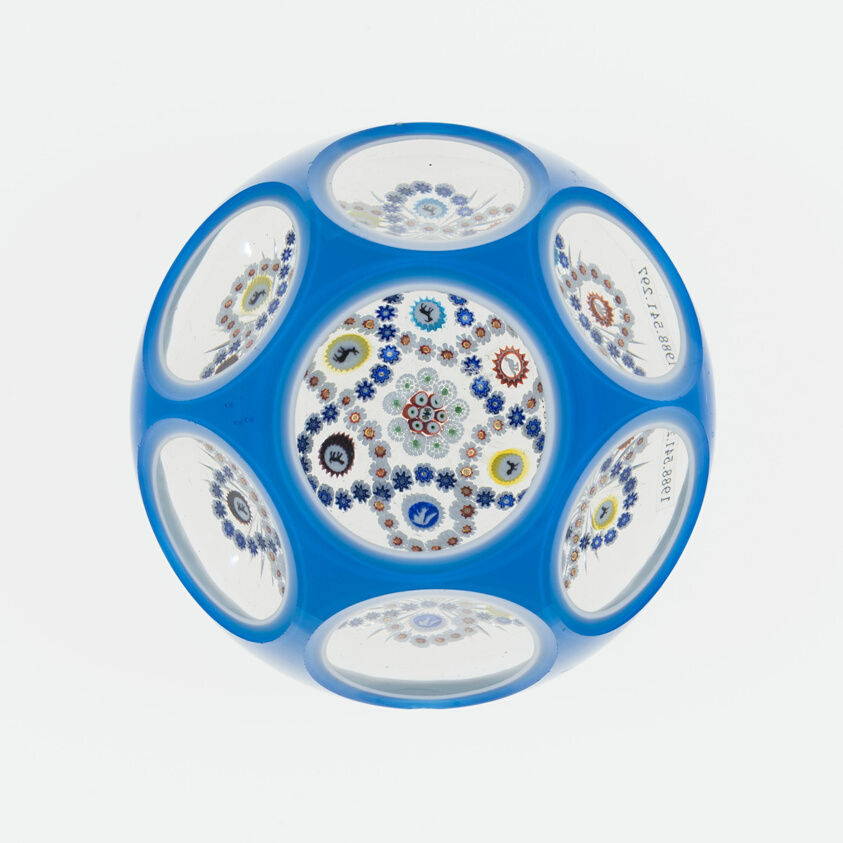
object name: Glass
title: Paperweight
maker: Baccarat Glassworks (Cristalleries de Baccarat); Lorraine, France, founded 1764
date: c. 1845–60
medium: Glass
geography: Baccarat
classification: paperweight; glass